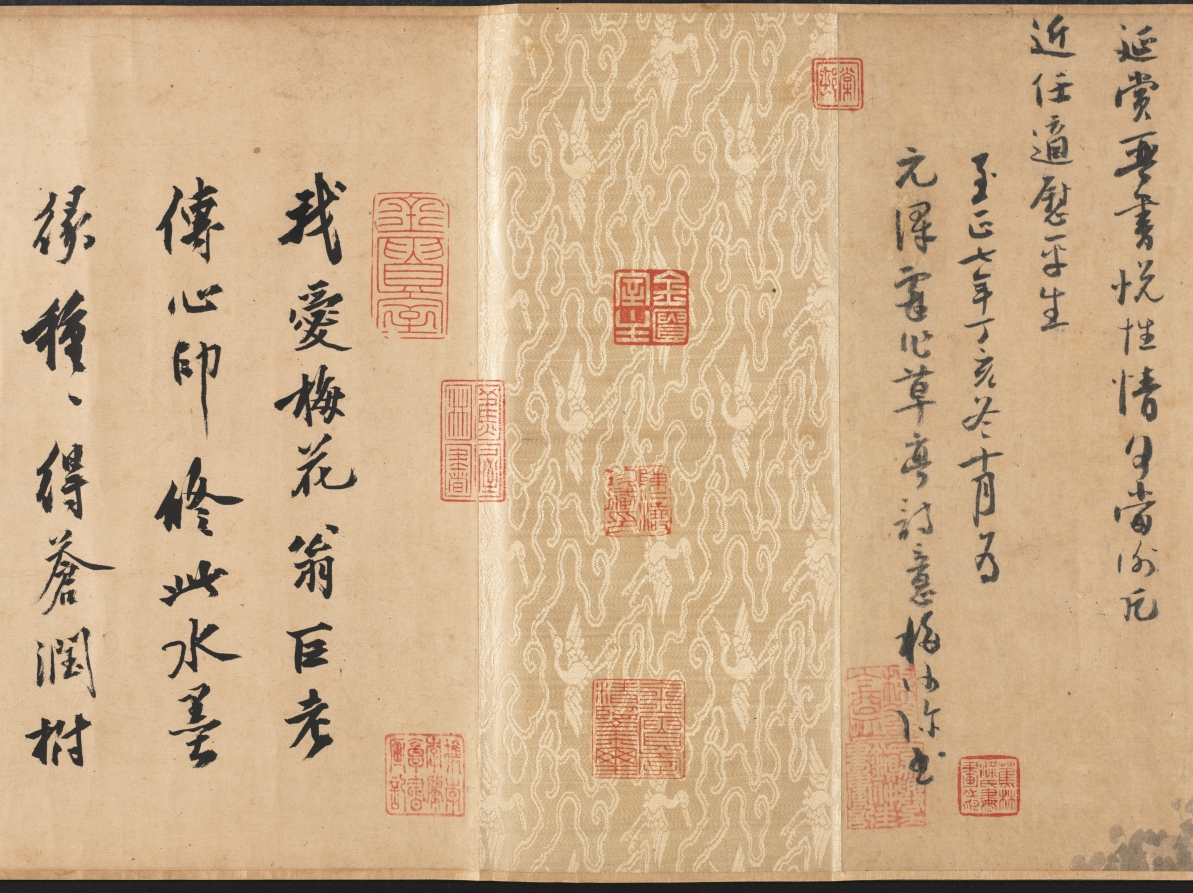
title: Poetic Feeling in a Thatched Pavilion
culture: China, Yuan dynasty (1271-1368)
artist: Wu Zhen (Chinese, 1280–1354)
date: 1347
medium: handscroll; ink on paper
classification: Painting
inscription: 依村構草亭，端方意匠宏。 林深禽鳥樂，塵遠竹松輕。 泉石俱延賞，琴書悅性情。 何當謝凡近，任適慰平生。 至正七年丁亥冬十月，為元澤戲作草亭詩意。梅沙彌書 [印]楳華盦; 嘉興吳鎮仲圭書畫記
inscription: 我愛梅花翁，巨老傳心印。 脩此水墨缘，種種得蒼潤。 樹石墮筆鋒，造化不能吝。 而今橡林下，我願執掃汛。 後學沈周 [印]启南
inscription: Colophon by Chen Rentao (1952): 予求梅道人畫二十年不可得。所見多膺鼎，即故宮所藏山水數軸都不可靠。傳世真迹，惟《漁父圖》、《嘉禾八景》與此《草亭詩意》而已。壬辰十月十四日余大病初愈，居家休養，研山師忽持此圖相贈。展卷披覽，頓覺精神沛振，如服僊藥。同日又得宋拓柳公權《神策軍紀聖德碑》，及群玉堂藏《真草書千(字)文》，皆海內孤本。一日得數寶，欣喜何如，書以志幸。 陳仁濤識 [印]陳氏仁濤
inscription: Colophon by Chen Rentao: 此圖作於至正七年丁亥，時年六十八，盖其晚年神品也。 濤又識 [印]陳仁濤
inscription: Title on frontispiece by Li Dongyang 李東陽 (1447-1516).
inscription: 33 additional seals: 1 seal of Li Chao-heng 李肇亨 (1592-1664)：檇李李肇亨書畫記; 9 seals of Liang Qingbiao 梁清標 (1620-1691): 蒼巖子、蕉林、蕉林梁氏書畫之印、蕉林秘玩、蕉林書屋、蕉林玉立氏圖書、棠邨 (appears twice)、棠邨審定; 1 seal of Wang Yirong (1845-1900): 懿榮; 3 seal of Li Yanshan (1898-1961): 雙銕笛樓 (appears twice)、硯山心賞; 12 seals of Chen Rentao 陳仁濤（1906-1968）：陳氏仁濤、陳仁濤珍藏印、金匱寶藏·陳氏仁濤 (appears three times)、金匱秘笈、金匱室、金匱室精鑒璽 (appears twice)、金匱室主、金匱神品、仁濤奇緣; 1 seal: 崐溟居士; 1 seal: 林止在㭯生圖書印; 3 seals unidentified.